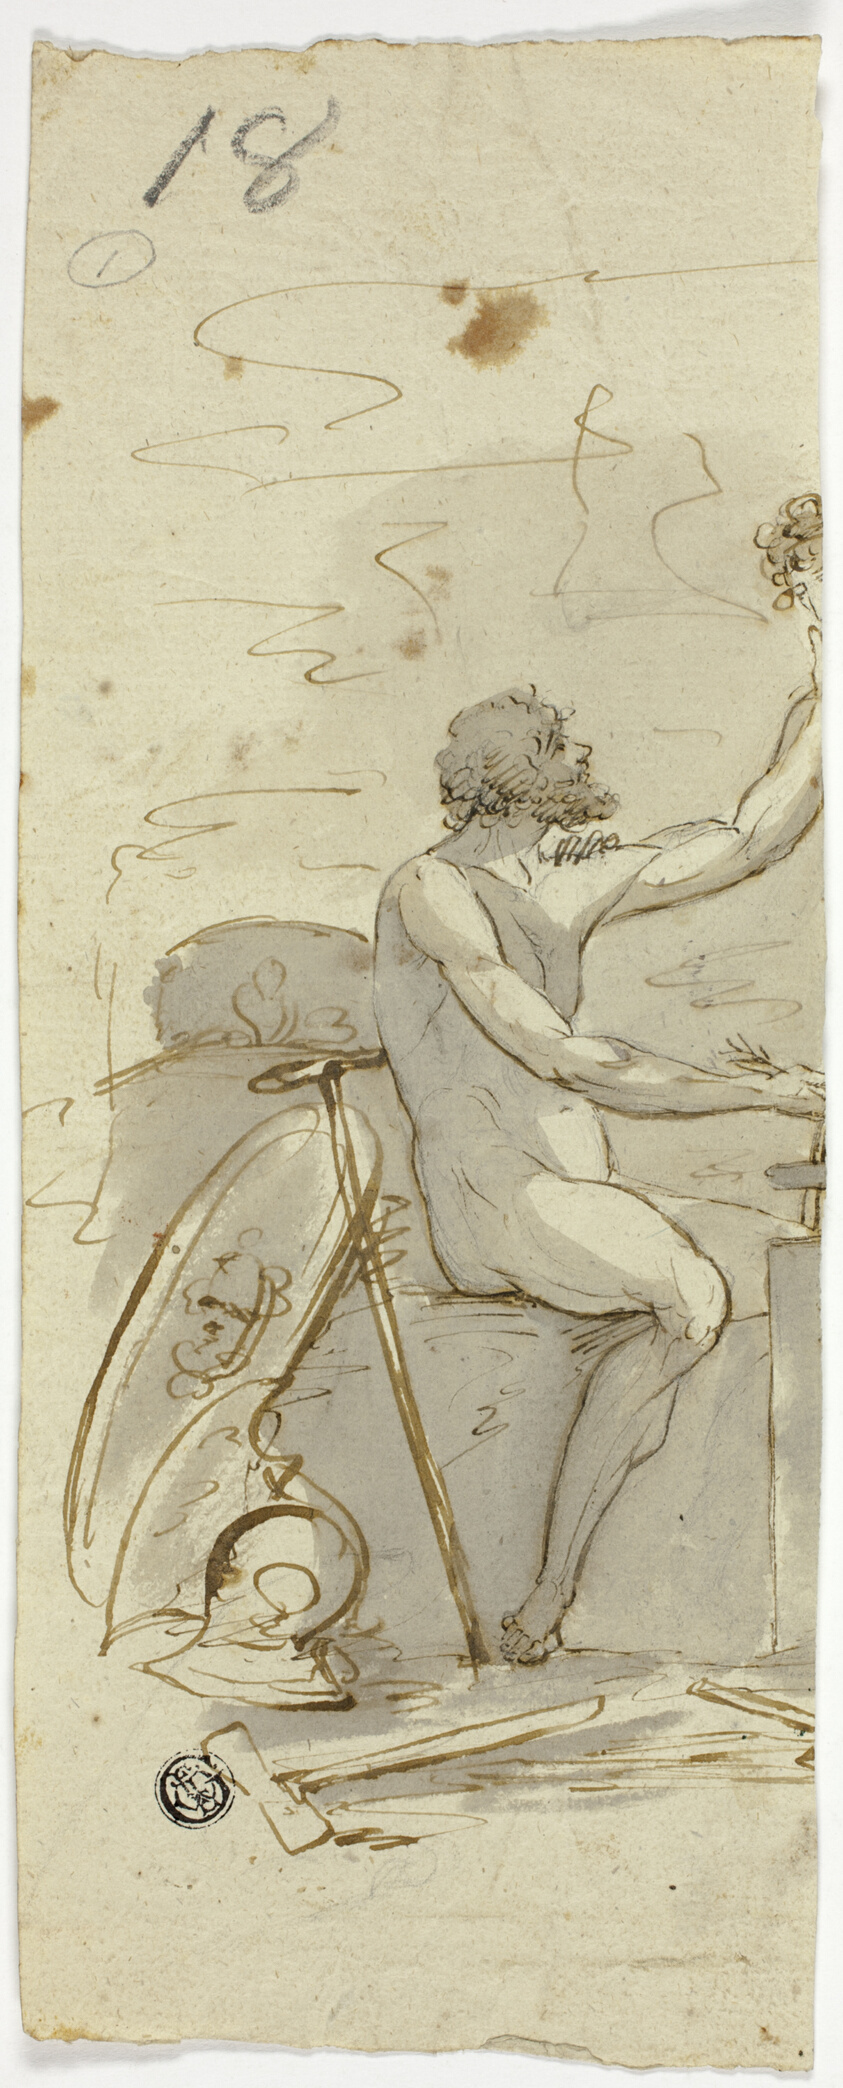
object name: Drawing and Watercolor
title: Vulcan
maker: Unknown Artist; Italian, 1700-1799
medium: Pen and brown ink, with brush and gray wash, on ivory laid paper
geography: Italy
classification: pen and ink drawings; drawings (visual works); prints and drawing